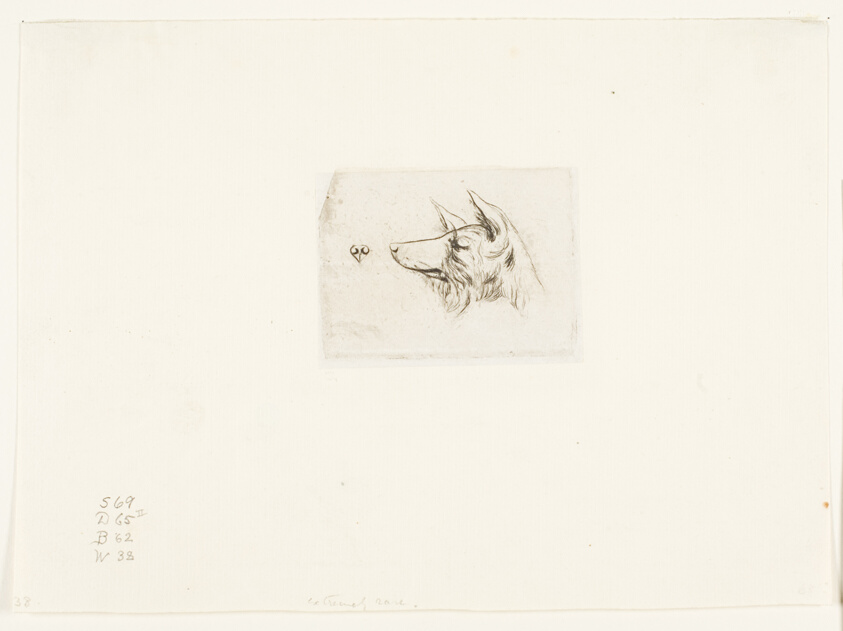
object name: Print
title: Head of a New Holland Dog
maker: Charles Meryon (French, 1821-1868)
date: 1860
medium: Etching with engraving on grayish ivory chine, laid down on ivory laid paper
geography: France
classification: etching; print; prints and drawing